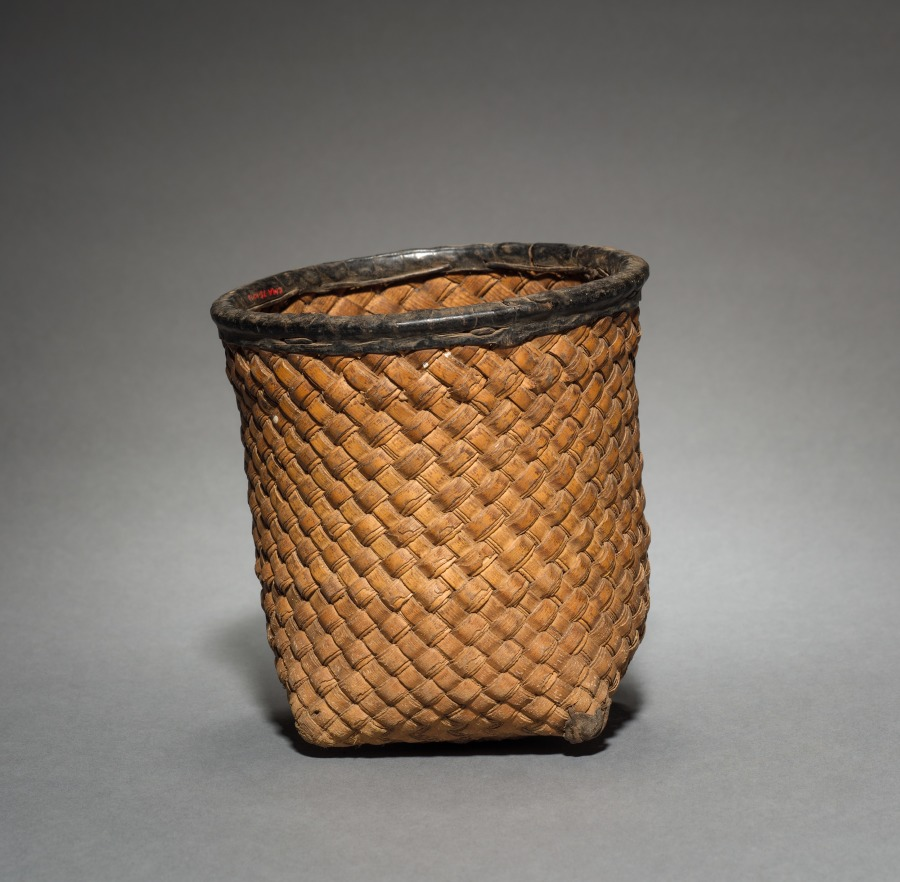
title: One of Ten Nesting Wedding Baskets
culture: Africa, Western Africa, Burkina Faso, Lobi–style maker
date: c. 1900s?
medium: Plant fiber and leather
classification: Vessels